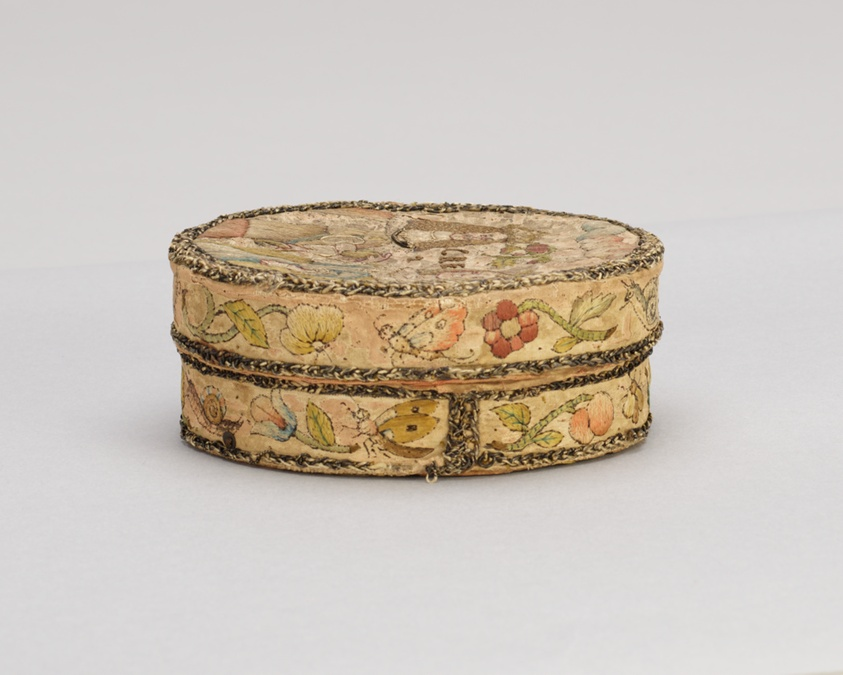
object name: Textile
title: Oval Box Showing Charles II and Catherine of Braganza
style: 17th Century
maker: England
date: c. 1660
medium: Silk, plain weave; embroidered with silk floss foremost in satin stitch; French knots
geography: England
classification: needlework (visual works); textile; portrait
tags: portrait, coat of arms, royalty, crowns, robes, dresses, foliage, snail, butterflies, flowers, botanical/floral, insects